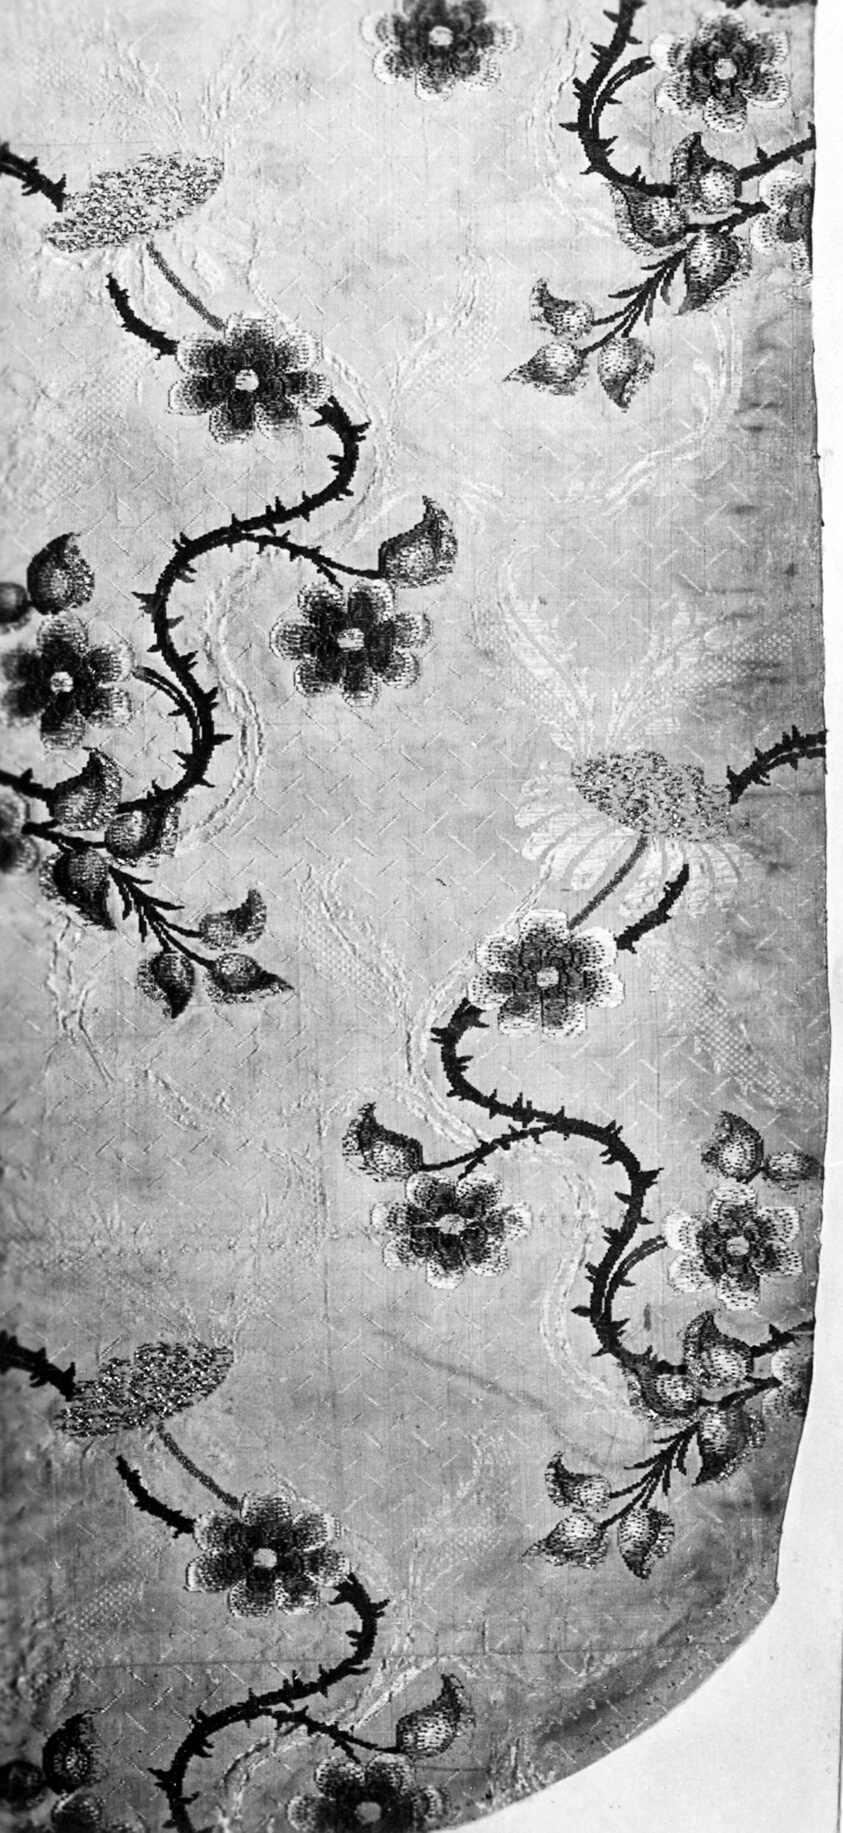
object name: Textile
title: Fragment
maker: France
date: Mid–18th century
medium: Silk, brocaded plain compound cloth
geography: France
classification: textile; weaving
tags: flowers, vines